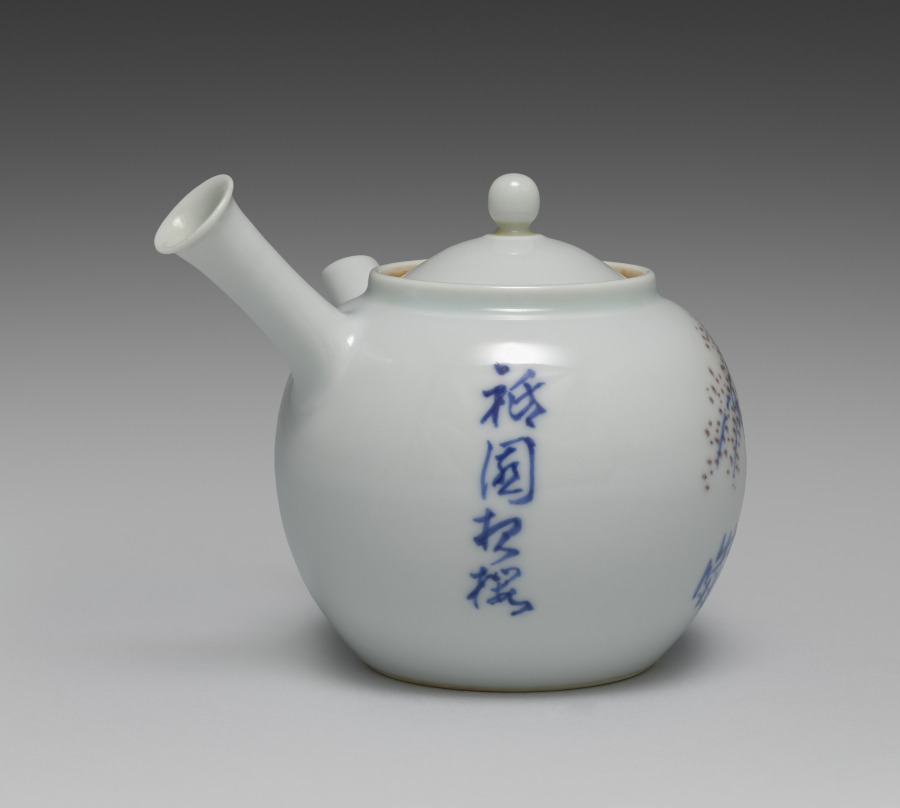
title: Teapot with Cherry at Night in Gion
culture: Japan, Meiji period (1868–1912)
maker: Seifū Yohei III (Japanese, 1851–1914)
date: 1893–1914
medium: Porcelain with underglaze blue and iron oxide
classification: Ceramic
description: This side-handled sencha teapot with the cherry tree has a nearly spherical shape, and its recessed lid has an ovoid knob. It has both blue and a purplish brown under the glaze for the blossoms and embers on one side, and the vertical calligraphy identifies the tree as a cherry tree at night in the Gion area of Kyoto. To the right of the tree, smoke billows from a small lantern fire in a basket suspended on a post. In terms of collecting history, a paper inserted into the box of Teapot with Cherry at Night in Gion is of interest. It is a flyer for Yamamoto Shōseidō, a shop (no longer extant) that sold fine Kyoto ceramics in Osaka.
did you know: This teapot features the Japanese theme of a blossoming cherry tree in the Gion area of Kyoto in underglaze blue and brown.